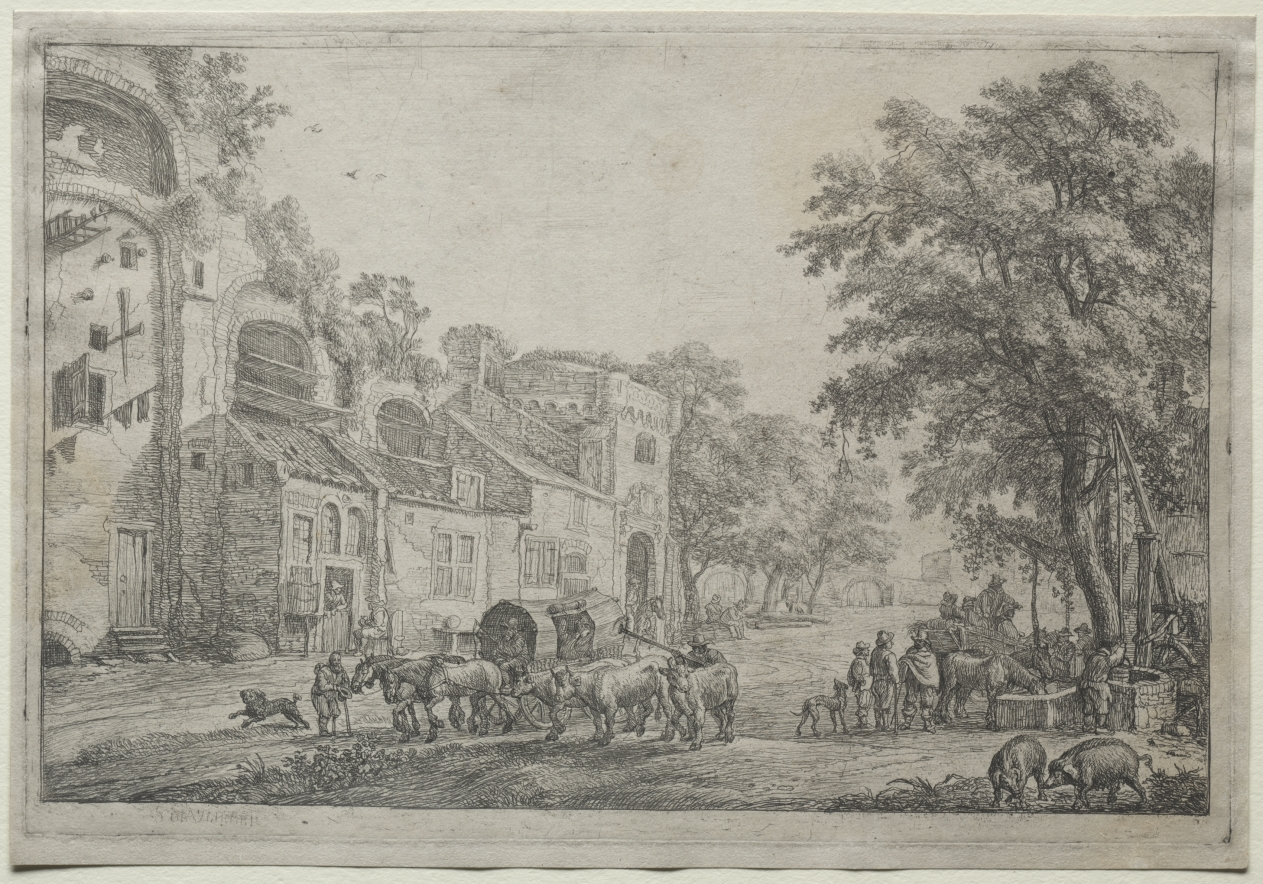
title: The Approach to a Village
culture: Netherlands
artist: Simon de Vlieger (Dutch, 1601–1653)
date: 1615–53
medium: etching and drypoint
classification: Print